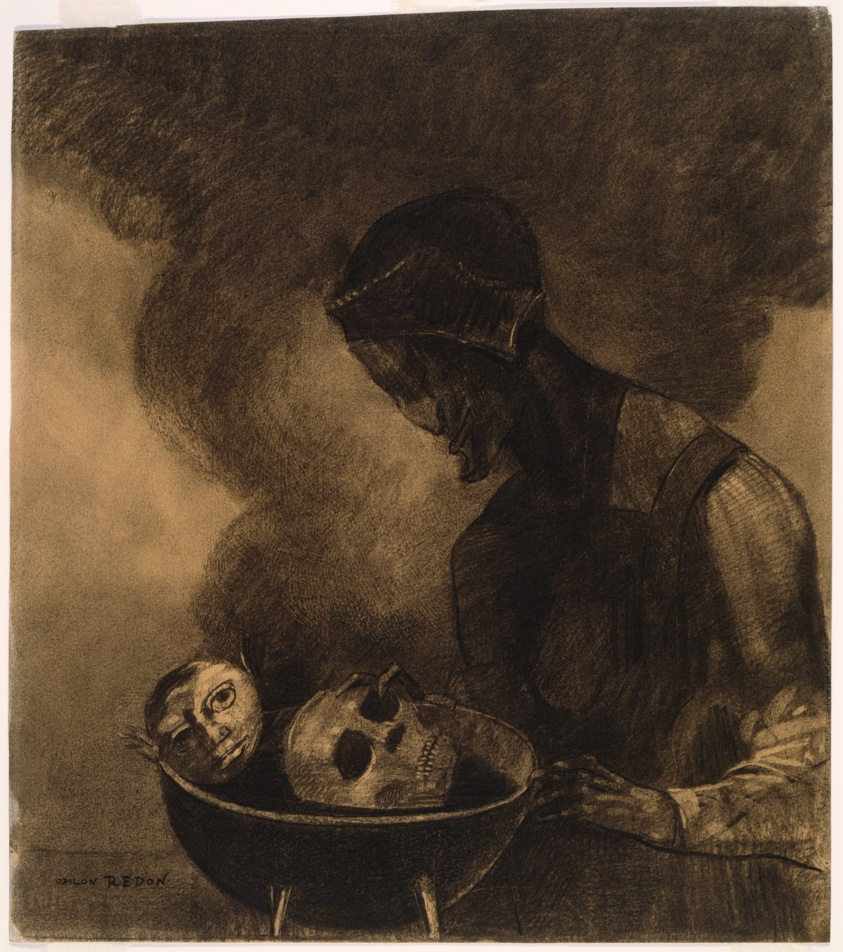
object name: Drawing and Watercolor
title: Cauldron of the Sorceress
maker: Odilon Redon (French, 1840-1916)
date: 1879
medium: Various charcoals, with stumping, erasing, and incising, on pale-pink wove paper with red and blue fibers altered to a golden tone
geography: France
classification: charcoal; drawings (visual works); prints and drawing; paper